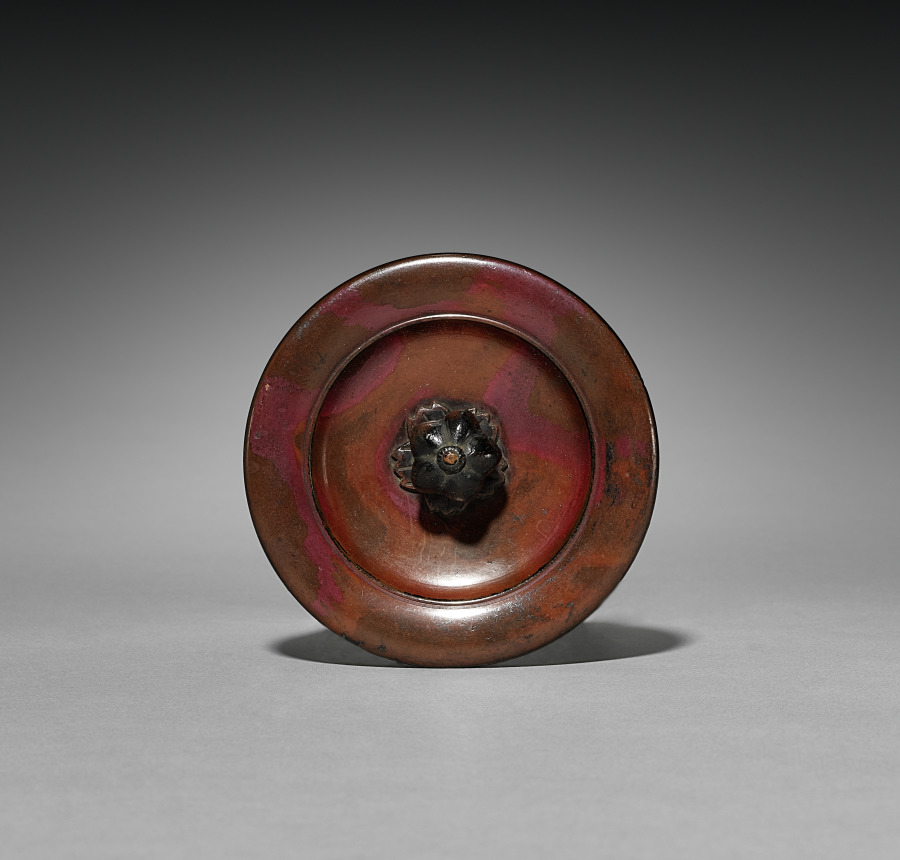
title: Cover for Tea Kettle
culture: Japan, Edo period (1615–1868)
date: 1615–1868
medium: iron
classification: Metalwork